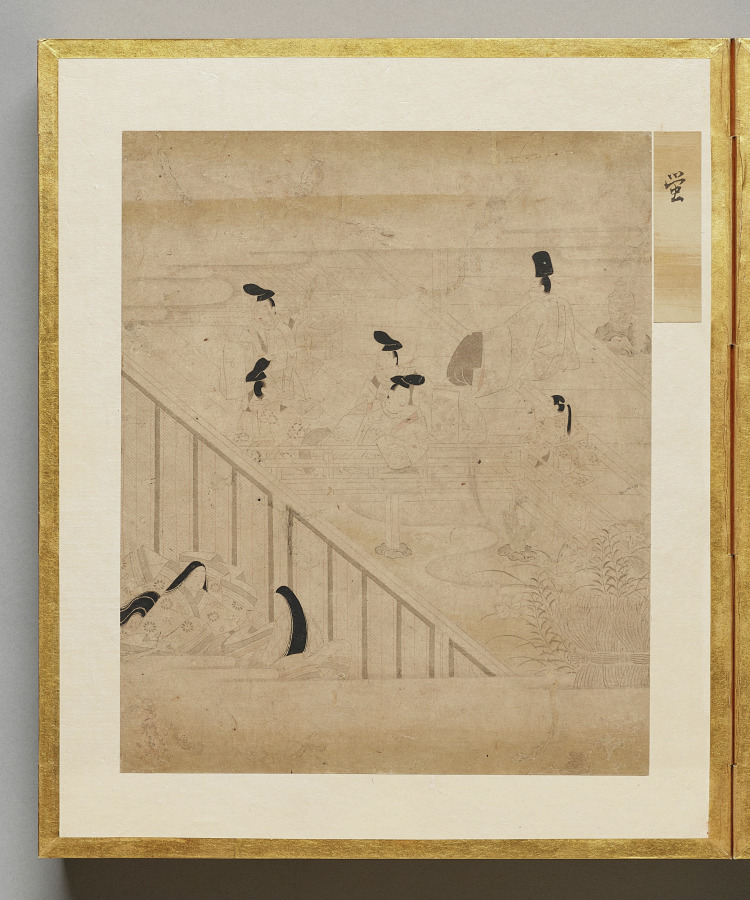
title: Fireflies from Album of Illustrations for the Tale of Genji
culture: Japan, Edo period (1615–1868)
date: 1600s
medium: painting in an accordion-style album; ink, light color, and gold on paper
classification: Bound Volume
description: This album contains illustrations for the classic literary work the Tale of Genji, authored in the 1000s by Murasaki Shikibu, an aristocrat of the Heian period (794–1185) court. The scenes are painted in the “white drawing” (hakubyō) mode, in which a fine ink line is used to depict figures and spaces with great subtlety, punctuated only occasionally by traces of red pigment for a character’s lips, a detail of a garment, or a decorative element. These two scenes illustrate episodes from the chapters “Thin Veil of Cloud” (Usugumo) and “Barrier Gate” (Sekiya).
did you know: The illustrations are identified by chapter title in cartouches to the upper right of the paintings.